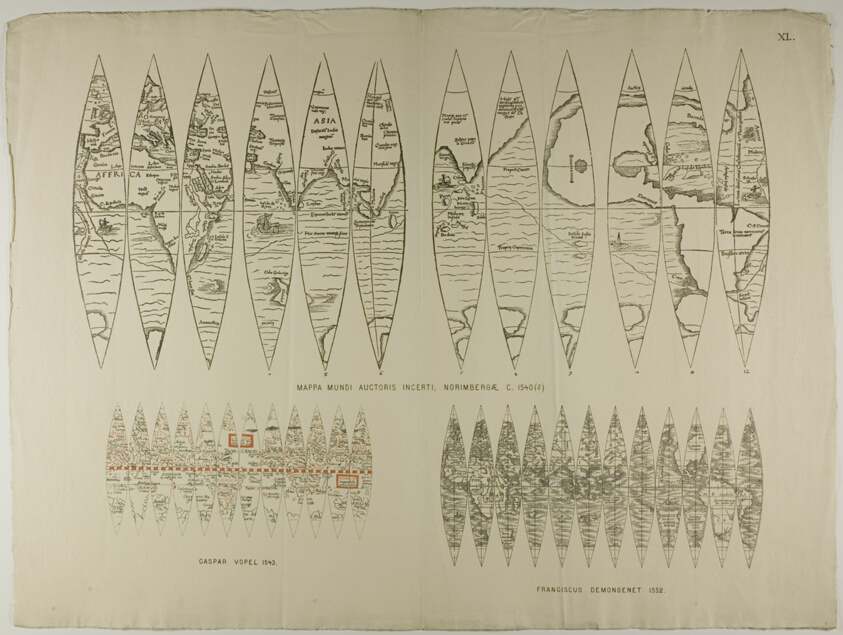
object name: Print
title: Maps: Projections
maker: Unknown Artist; English, 19th century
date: 1540/1552, reprinted 1889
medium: Engraving in black on cream laid paper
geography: England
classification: reproduction; print; prints and drawing